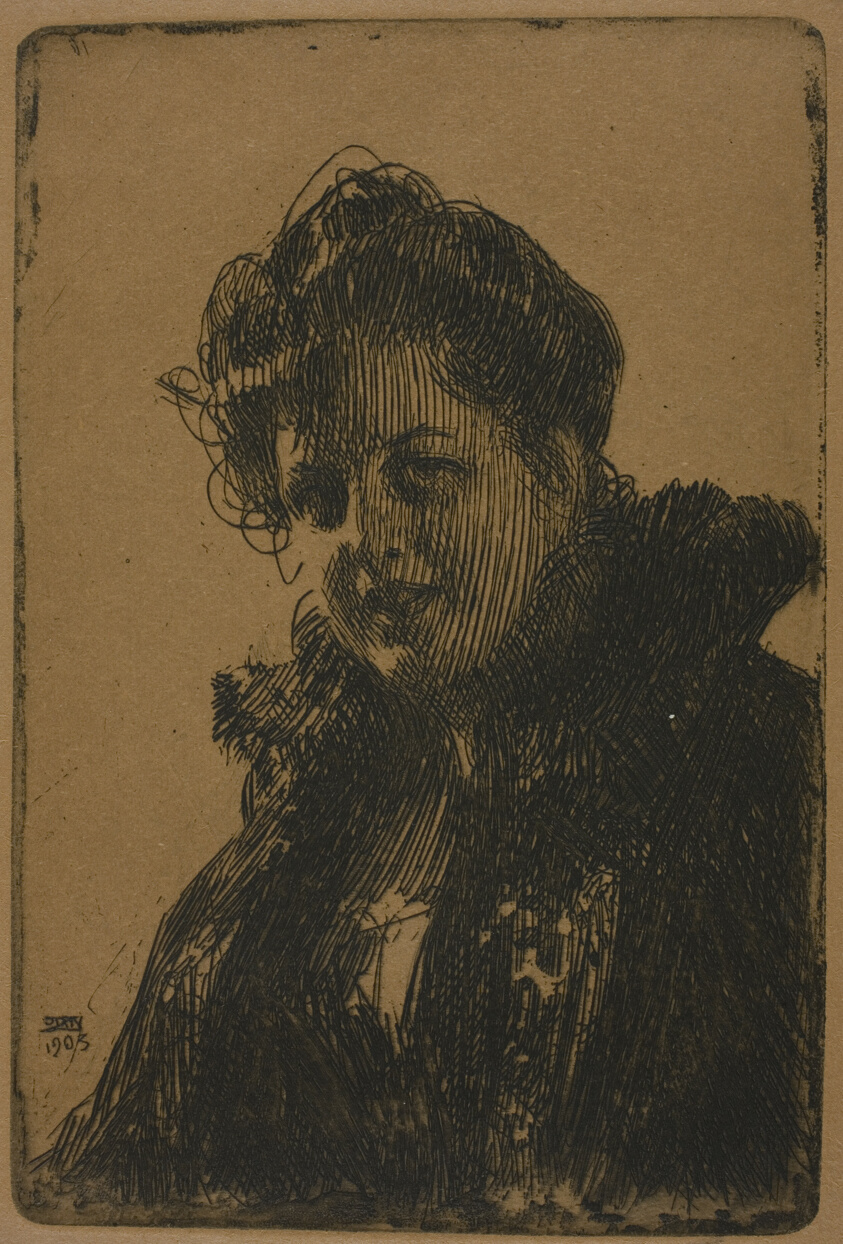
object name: Print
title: Mrs. Granberg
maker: Anders Zorn (Swedish, 1860-1920)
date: 1903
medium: Etching on red-brown paper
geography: Sweden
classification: etching; print; prints and drawing